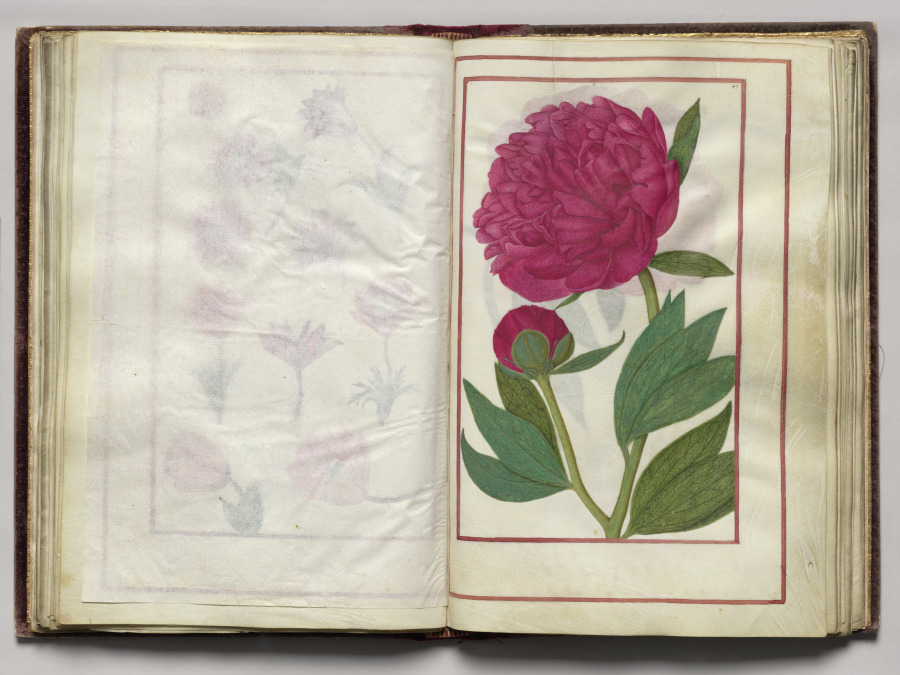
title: Florilegium (A Book of Flower Studies)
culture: France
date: 1608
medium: bound manuscript of 48 leaves, 77 drawings; watercolor, ink, silver, and gold over occasional traces of pencil, on vellum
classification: Bound Volume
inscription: Dated: Poitiers 1608 (on frontispiece) Signed: On frontispiece in black ink, lower right: Van Kuyk Notation on drawing: Frontispiece: in pencil, lower margin: * élève de Van Kessel, peintre flammand (* in pencil also appears in front of Van Kuyk's name).